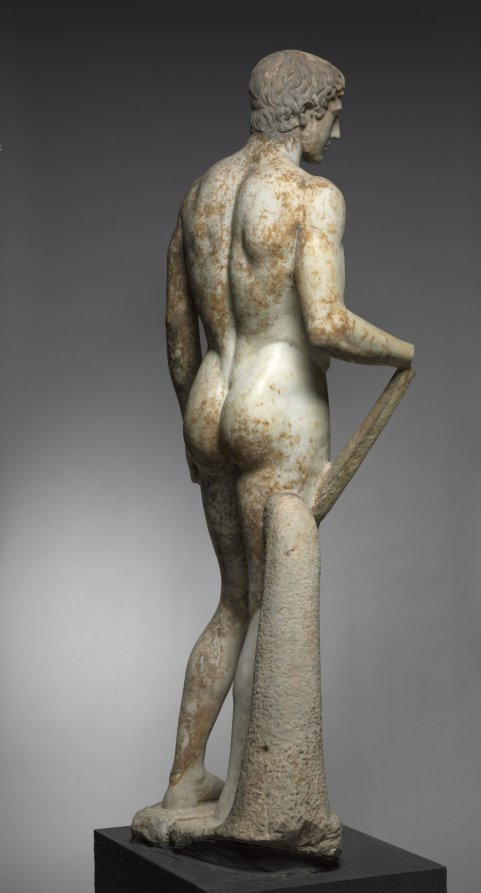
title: Statue of an Athlete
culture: Italy, Roman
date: 1–100 CE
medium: marble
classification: Sculpture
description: This idealized athlete recalls Greek sculptural types invented and popularized during the 400s BC. Large-scale athletes and other sculptures like this were originally created by famous artists as sanctuary dedications. Centuries later, they were widely copied and adapted by Roman sculptors, whose clients sought their own versions of earlier masterpieces. Working in marble rather than bronze, these sculptors added certain elements for stability, such as the struts and the large tree trunk beside the right leg here. Sculptures like this one are profoundly complex, made by and for Romans but descended from Greek ancestors.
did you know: For many years, this sculpture stood in the rotunda of the Cleveland Museum of Art.